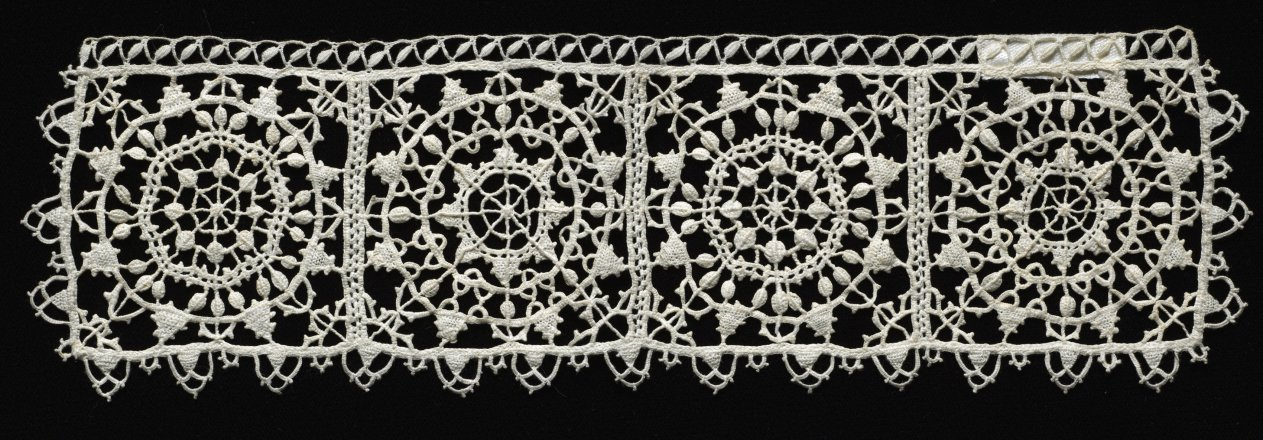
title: Lace Cuff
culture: Italy, Genoa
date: 1550–99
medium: Needle lace (reticella)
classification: Lace